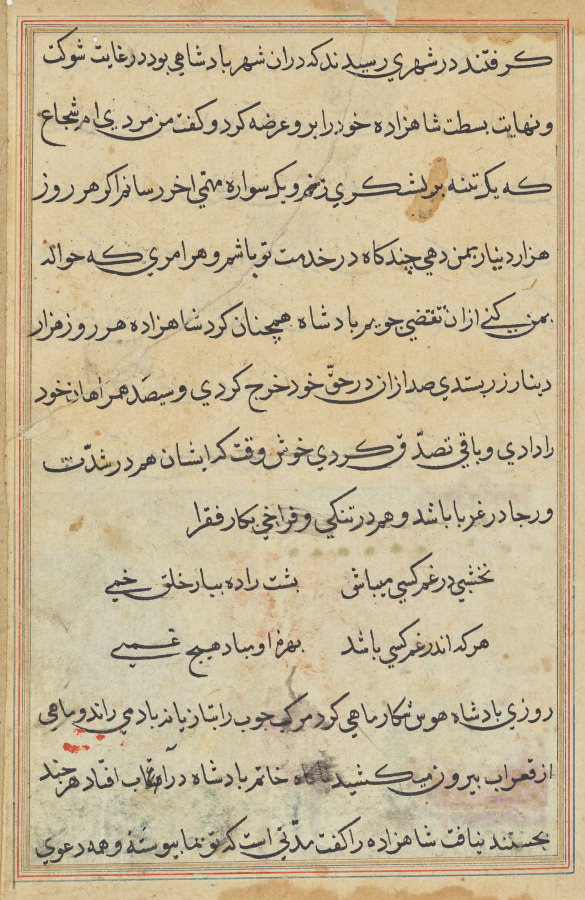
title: Page from Tales of a Parrot (Tuti-nama): text page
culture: Mughal India, court of Akbar (reigned 1556–1605)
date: c. 1560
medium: gum tempera, ink, and gold on paper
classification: Painting